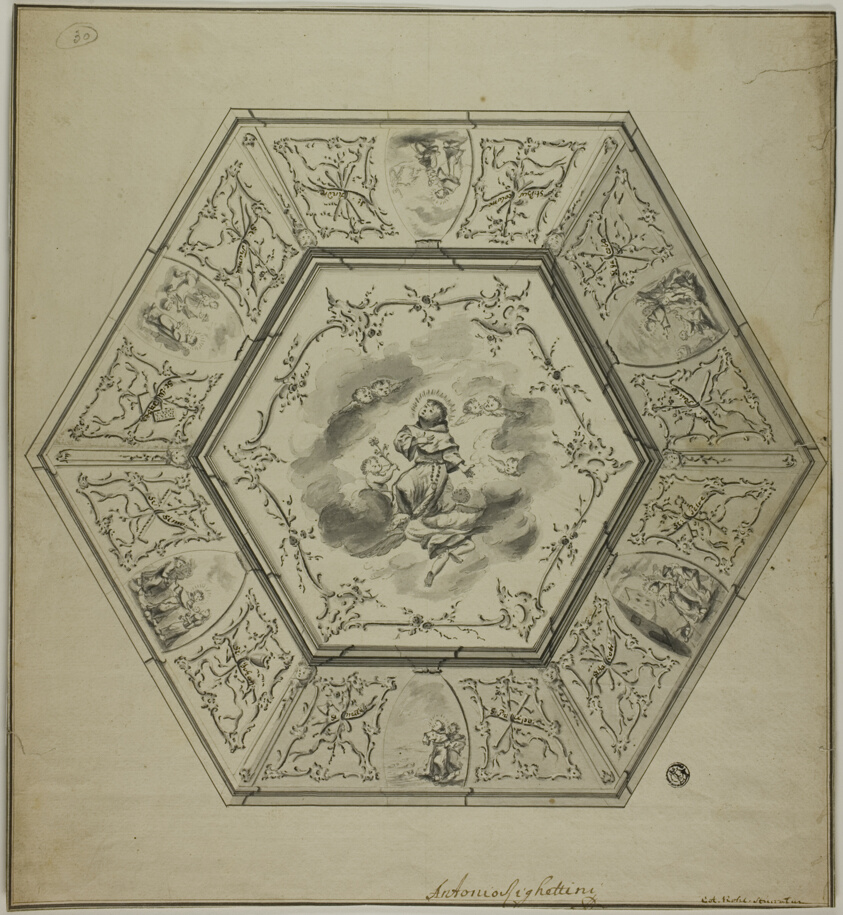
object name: Drawing and Watercolor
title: Ceiling Design with Saint Anthony of Padua Surrounded by Episodes from his Life and Symbols of Martyrdom of the Apostles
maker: Unknown Artist; Italian, 18th century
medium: Pen and black ink, with brush and gray wash, over black chalk, with brown ink inscription, on cream laid paper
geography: Italy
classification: ink or chalk wash; drawings (visual works); prints and drawing